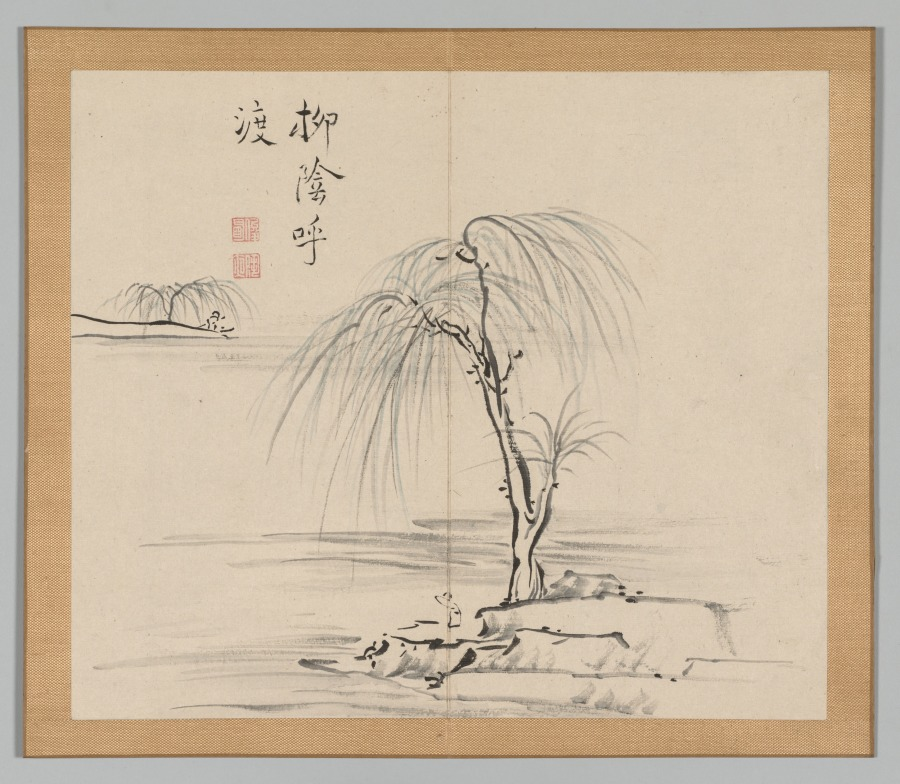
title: Reverberations of Taiga, Volume 2 (leaf 18)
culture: Japan, Edo period (1615–1868)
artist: Aoki Shukuya (Japanese, d. 1802)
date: mid- to late 1700s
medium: double-leaf from a pair of albums; ink and light color on paper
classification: Portfolio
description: Traditionally, young painters in Japan began their studies with an established master-painter. The master's compositions invariably became models that the apprentice copied to learn various ink and brush techniques. Shukuya was a pupil of the famous Kyoto artist Ikeno Taiga, whose style is reflected in these sketches of rocks, trees, and mountains.